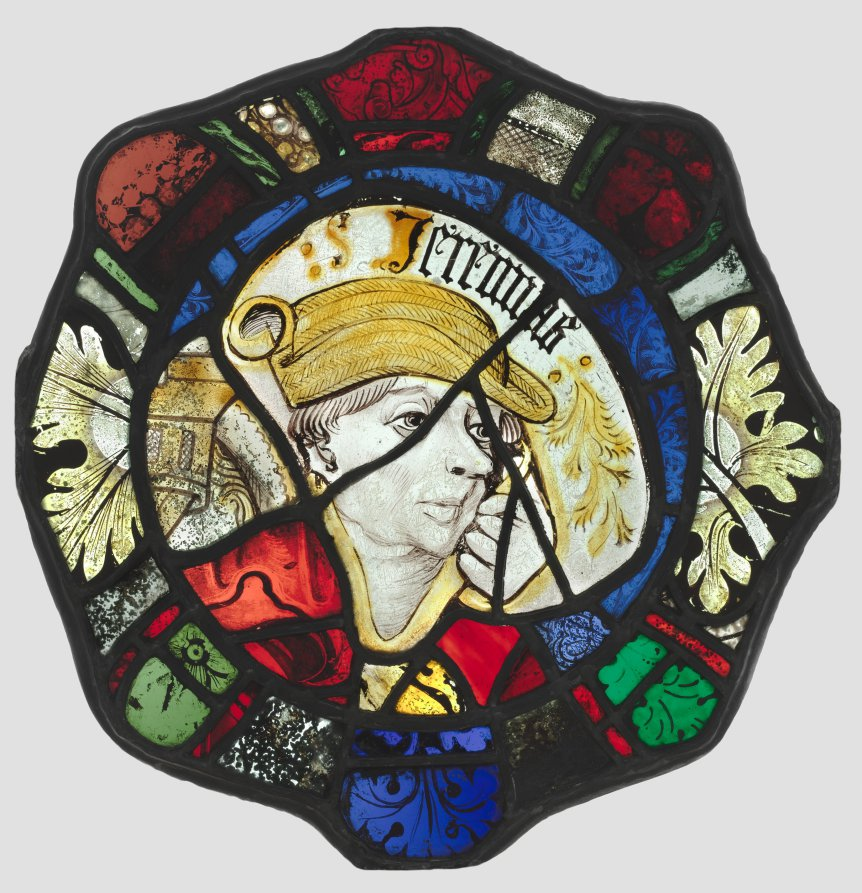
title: Jeremiah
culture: England, 15th century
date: c. 1440–1450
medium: white glass with silver stain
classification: Glass